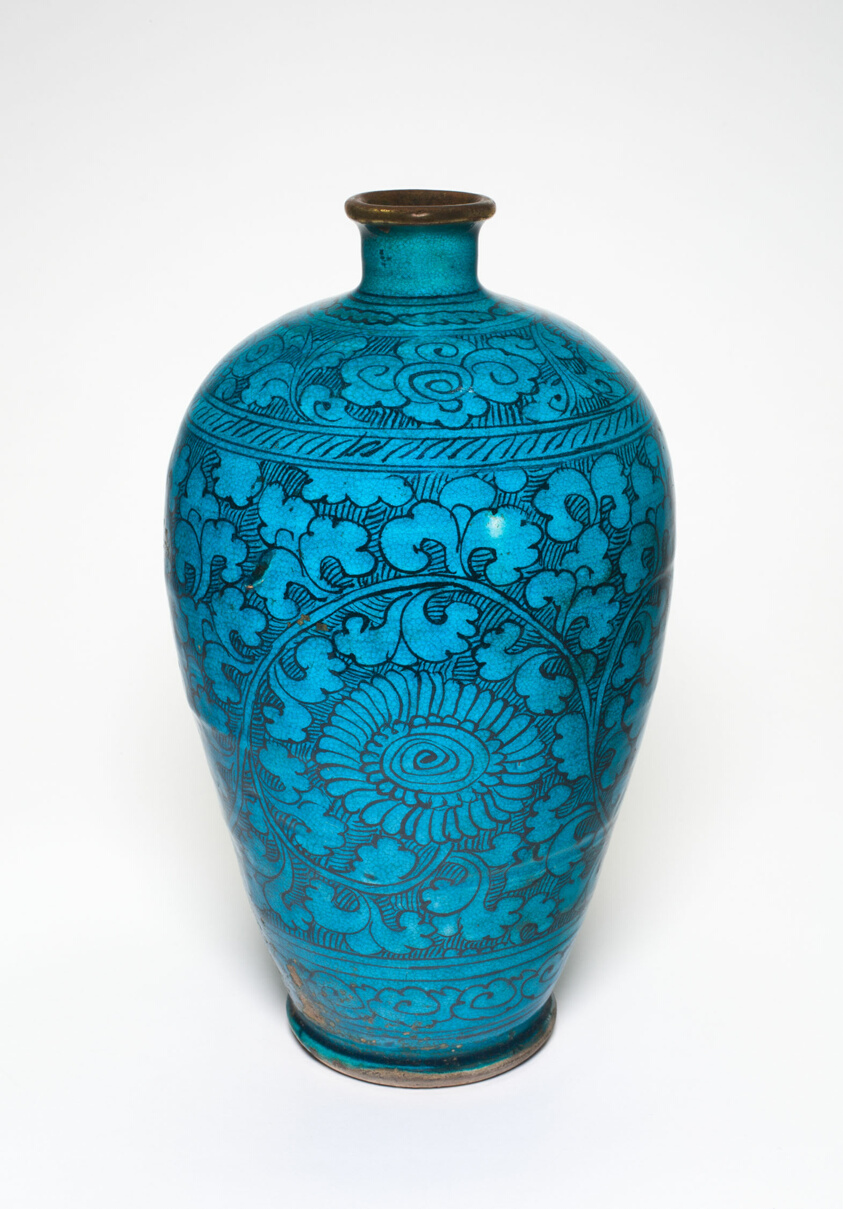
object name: Vessel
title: Vase with Flowers and Vines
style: Chinese (culture or style)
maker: China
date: Ming dynasty (1368–1644)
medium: Cizhou-type ware; stoneware with turquoise glaze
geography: China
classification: vase; vessel; earthenware; asian art; ceramics